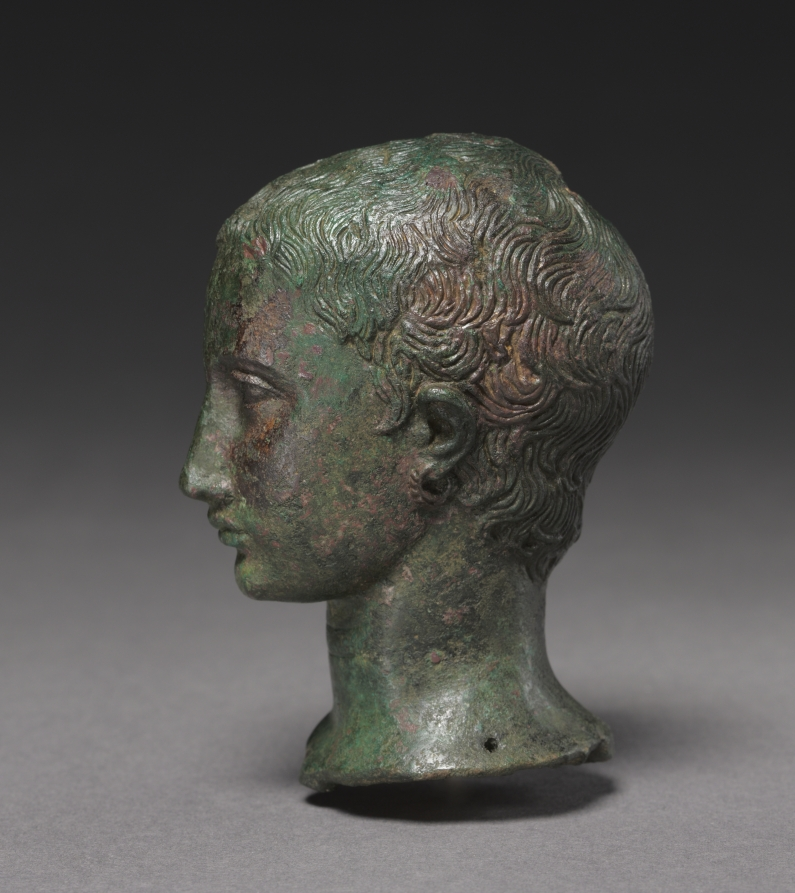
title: Portrait of a Young Girl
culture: Italy, Eastern Roman Empire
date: c. 25–30 CE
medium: bronze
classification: Sculpture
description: This bronze portrait has a boyish close-cropped hairstyle and rounded forehead. The irises of the eyes are now hollow but were once inlaid with material, possibly glass. The head was likely set into a body or bust and placed inside a tomb. This portrait head is distinctive for the particular arrangement of the comma-shaped locks of hair, which resembles portraiture during the later period of the reign of Tiberius (AD 25–30), a Julio-Claudian emperor. Some scholars believe that the earrings identify the figure as an Armenian prince, while others believe this to be a portrait of a young girl.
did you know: The earrings this young girl wears are similar to a pair in the CMA collection (1985.174).